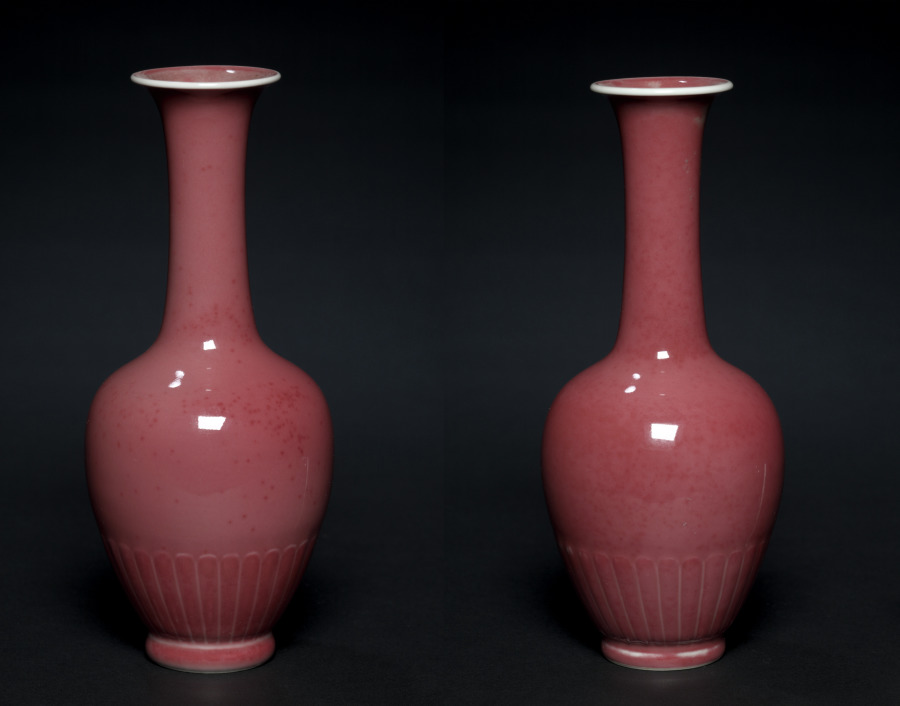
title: Pair of Lotus Petal Vases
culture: China, Jiangxi province, Jingdezhen, Qing dynasty (1644-1911), Kangxi period (1662-1722)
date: 1662–1722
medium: porcelain with "peach bloom" glaze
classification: Ceramic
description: The "peach-bloom" glaze developed during the Kangxi era has also been described as "drunken with beauty." Technical achievements were transcended with aesthetic associations, revealing the greatest sensitivity to all things beautiful in nature.